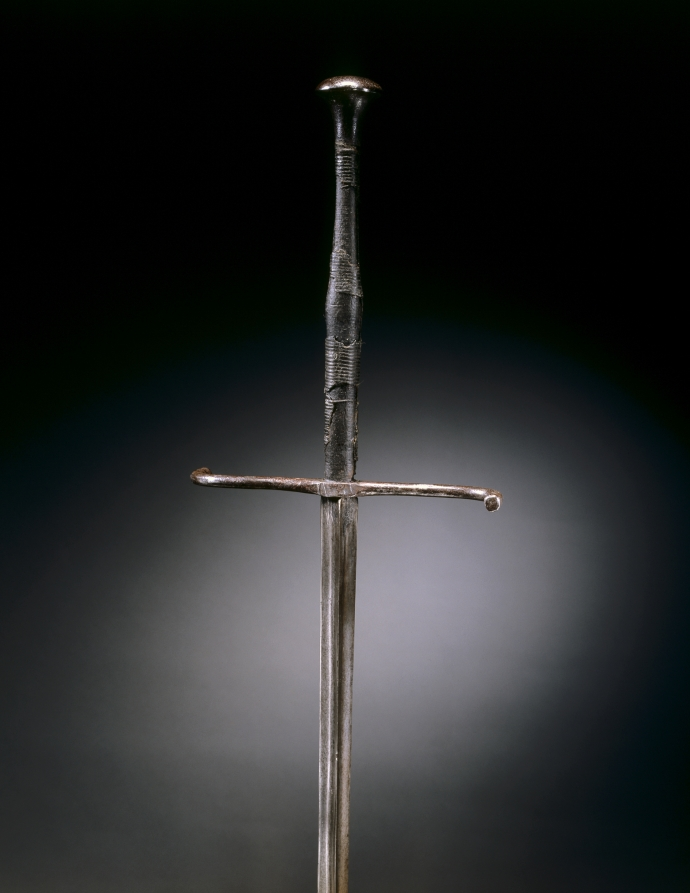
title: Estoc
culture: Germany, early 16th Century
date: early 1500s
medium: steel, wood and leather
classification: Arms and Armor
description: The French word estoc means "thrust" and therefore was adopted as the name for this long thrusting sword. It has a fairly long grip and simple cross-shaped hilt. The rigid blade, designed for thrusting at armored opponents, is three-sided for strength. The estoc was sometimes carried from the saddle. From the early 1300s, it was used by cavalrymen as an auxiliary side arm when a horseman had dismounted.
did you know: Swords like this one were developed to counteract and pierce the increasingly heavy armor and sophisticated plates that nearly covered a knight.